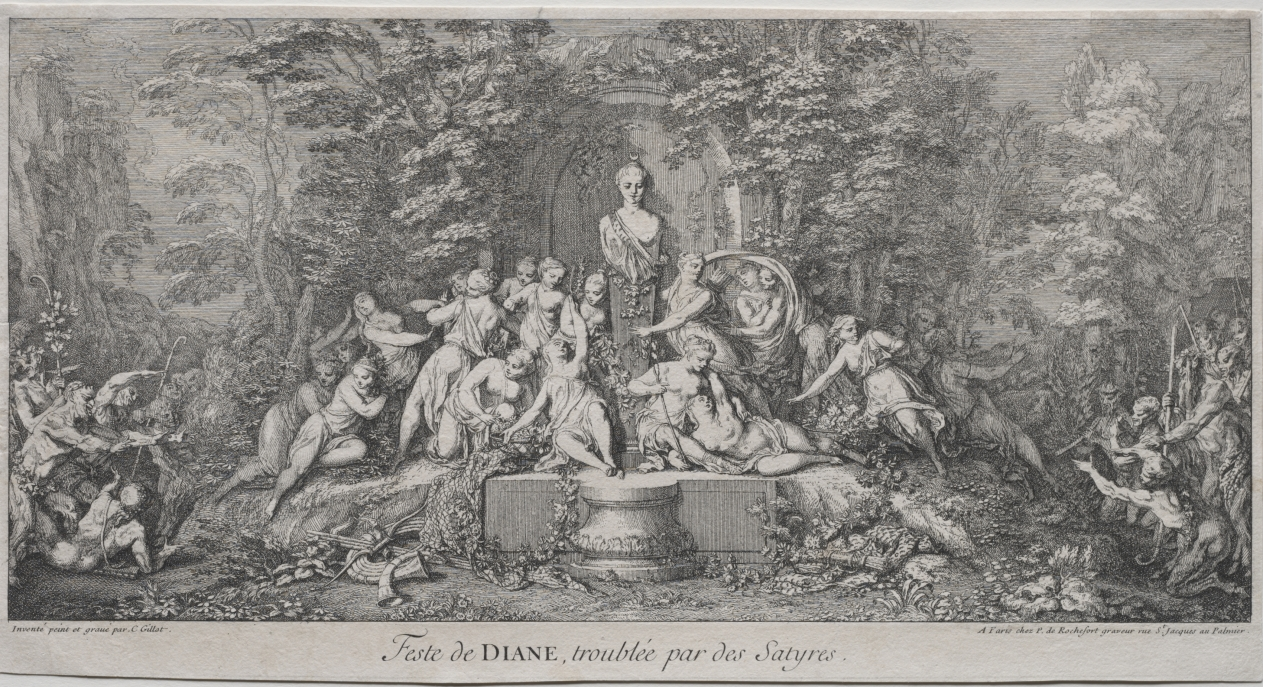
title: The Four Festivals: Festival of Diana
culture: France, 18th century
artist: Claude Gillot (French, 1673–1722)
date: c. 1693–1715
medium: etching and engraving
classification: Print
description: This depiction of the festival of Diana, Roman goddess of forests and animals, accompanies three other scenes glorifying the nature gods Faunus, Bacchus, and Pan. In each print a frame of flourishing vegetation surrounds nude and semi-nude figures who frolic around an altar with a bust to the god. The caption below the Festival of Diana declares that this celebration is being "troubled by satyrs," whose muscular, goat-legged bodies and leering faces appear at either edge of the wooded grove.